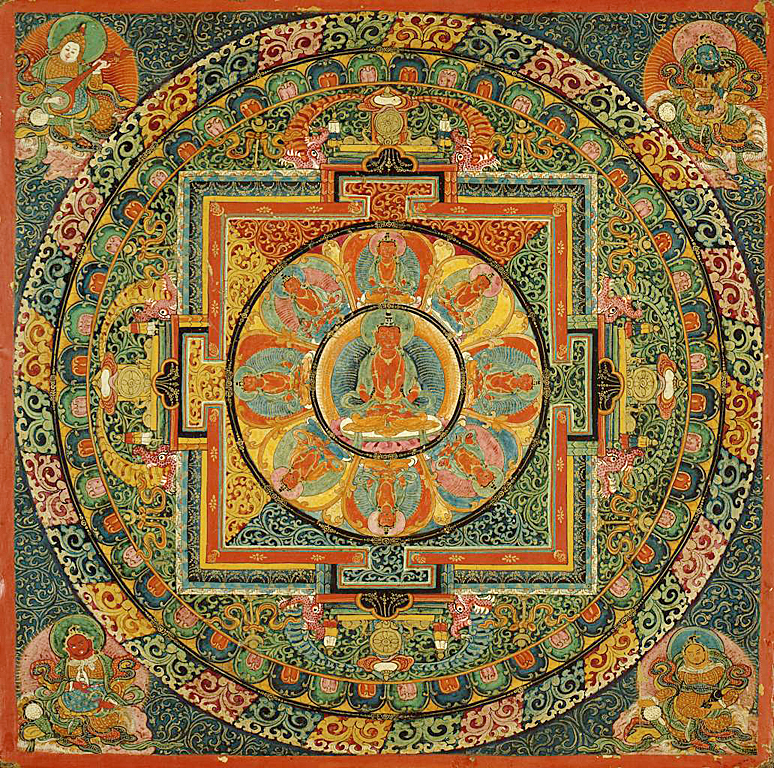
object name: Painting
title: Altar Table with Mandala of Amitayus, the Buddha of Infinite Life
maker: Tibet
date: 18th/19th century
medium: Opaque watercolor and gold on wood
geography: Tibet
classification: watercolor; painting; asian art